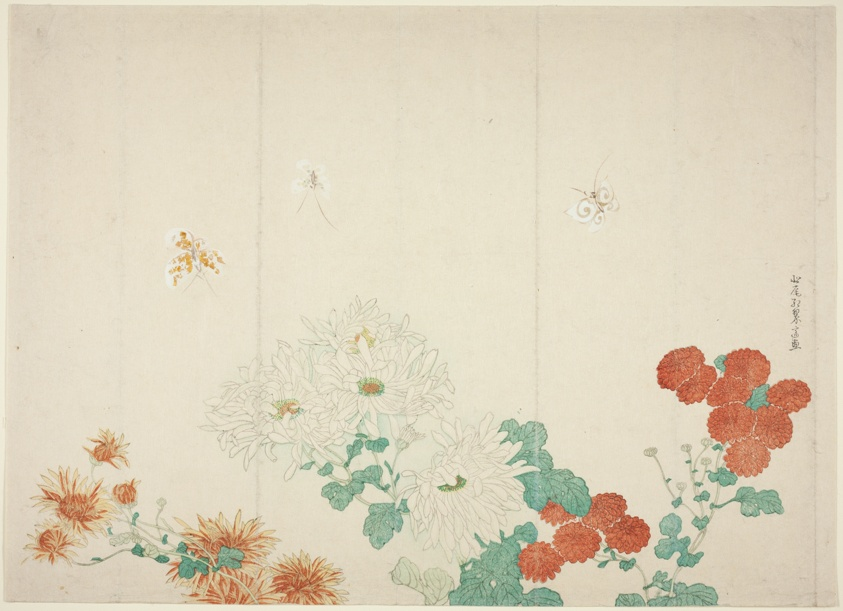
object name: Print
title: Three Types of Chrysanthemums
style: Japanese (culture or style)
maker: Kitao Shigemasa (Japanese, 1739-1820)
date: c. 1790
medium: Color woodblock print; surimono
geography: Japan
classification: woodblock print; print; asian art